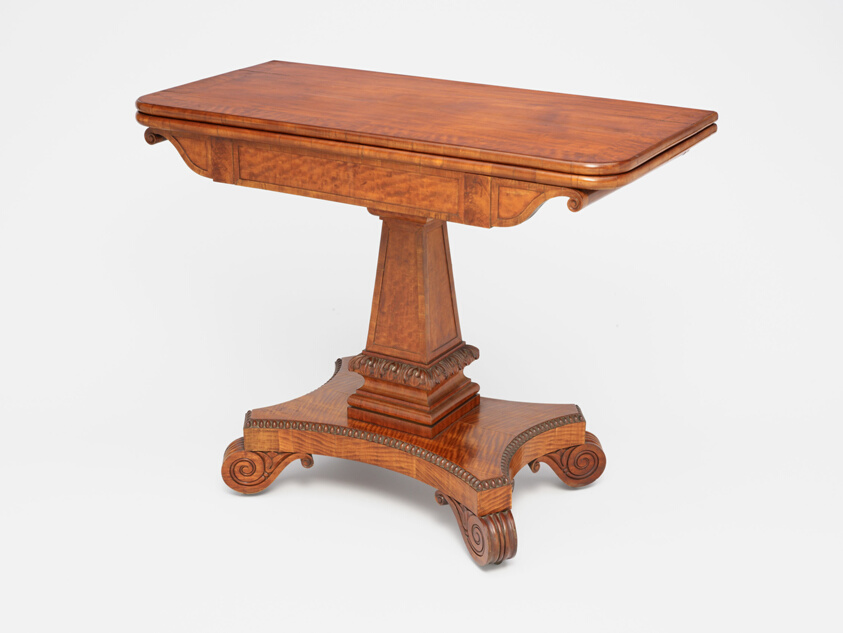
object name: Furniture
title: Card Table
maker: Isaac Vose & Son; American, 1819–25; Boston; Carving attributed to Thomas Wightman; American, active 1797–1825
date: 1819–25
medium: Mahogany, satinwood veneer, iron and brass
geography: Boston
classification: table; furniture; decorative arts